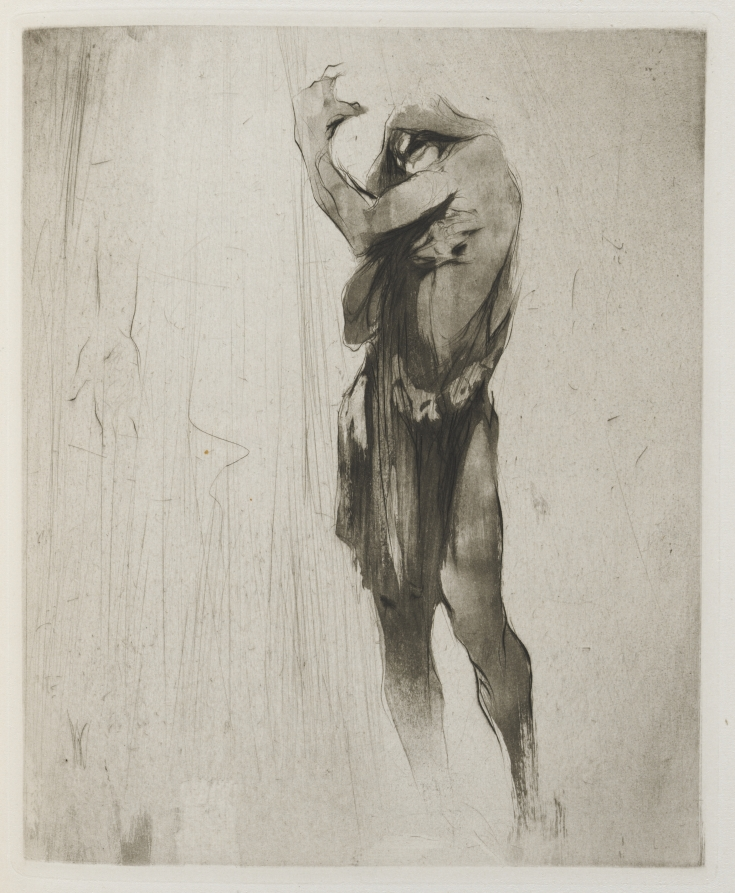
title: Herodias: Page 27, The voice rose: Woe to thee, Pharisees and Sadducees, race of vipers, bursting with pride!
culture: England, 20th century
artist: William Walcot (British, 1874–1943)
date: 1928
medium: etching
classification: Print